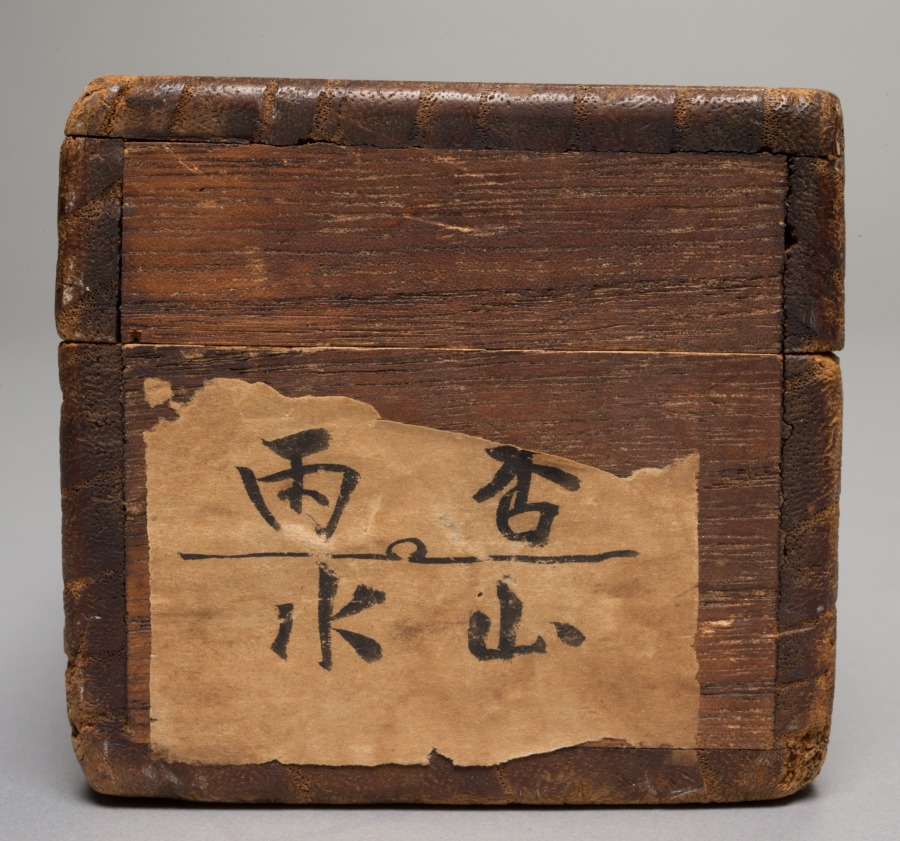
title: Sunset over Autumn Mountains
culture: Japan, Edo period (1615–1868)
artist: Hoashi Kyōu (Japanese, 1810–1884)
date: 1869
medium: hanging scroll; ink and light color on silk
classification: Painting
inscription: translation of poem [by Nora Liu]: The way was forgotten while enjoying the conversation and colors of Autumn, The road entered among the red trees and the white clouds, The trace of a path led to the lonely temple where the monks received enlightenment, The sound of chimes echo remotely in the mountains where the sunset falls. In the year 1869, Kyou